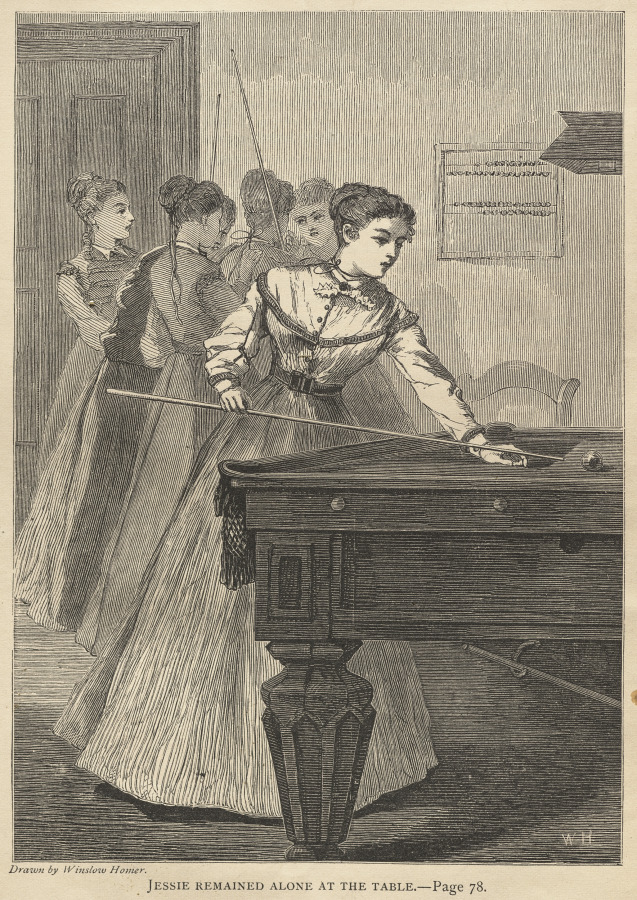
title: Jessie Remained Alone at the Table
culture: America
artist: Winslow Homer (American, 1836–1910)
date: 1868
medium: wood engraving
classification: Print